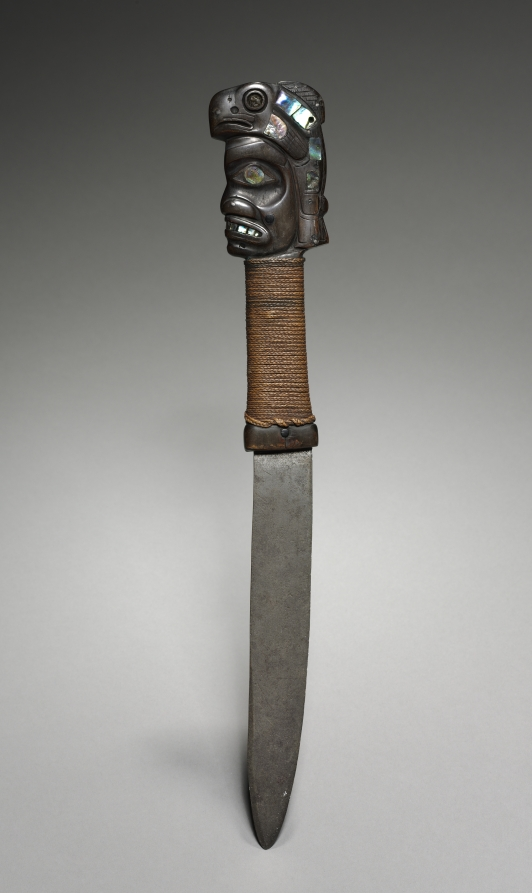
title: Dagger (Gwálaa)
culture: Native North America, Northwest Coast, Alaska, Tlingit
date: late 1800s–early 1900s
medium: Metal, shell, leather, fiber, ivory or horn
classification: Arms and Armor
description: After Europeans introduced firearms, the Indigenous Northwest Coast dagger transformed from a weapon into a status symbol worn in a sheath that hung from the neck. That may be the case with this example, which depicts a head surmounted by a fish, perhaps a salmon.